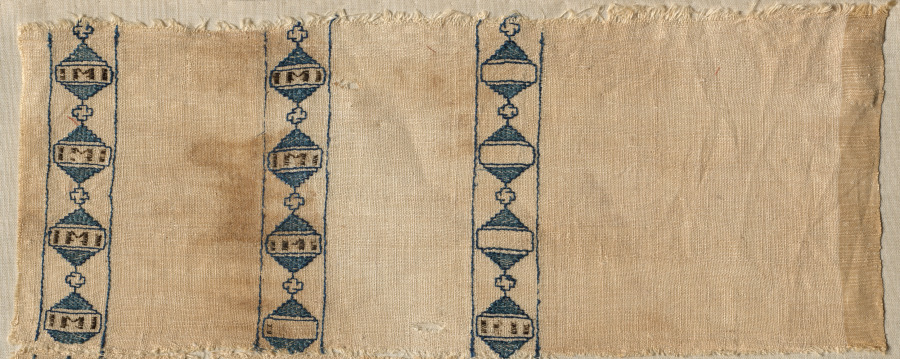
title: Two Fragments of a Scarf or Headdress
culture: Egypt, Mamluk sultanate (1250–1517)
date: 1300s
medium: silk embroidery on linen tabby ground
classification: Embroidery